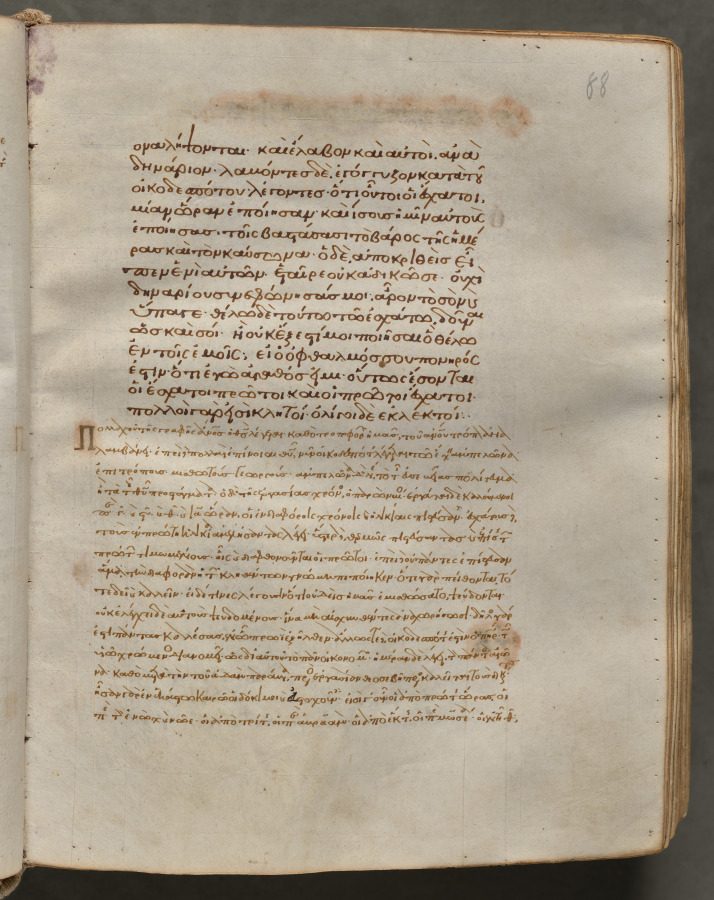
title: Text, folio 88 (recto), from a Gospel Book with Commentaries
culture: Byzantium, Constantinople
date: c. 1000–1100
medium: ink, tempera, and gold on vellum; leather binding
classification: Bound Volume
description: Each of the four gospels in this book opens on a page with brilliantly illuminated borders depicting the author of the text as well as birds-principally peacocks, symbols of the immortality of the soul-and fountains, representing the fountain of life and the salvation of the soul. This volume consists of 428 leaves with texts in Greek. Its level of sophistication suggests that it was probably written and decorated in a monastery in Constantinople.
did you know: Gospel Books were carried in procession through Byzantine churches.